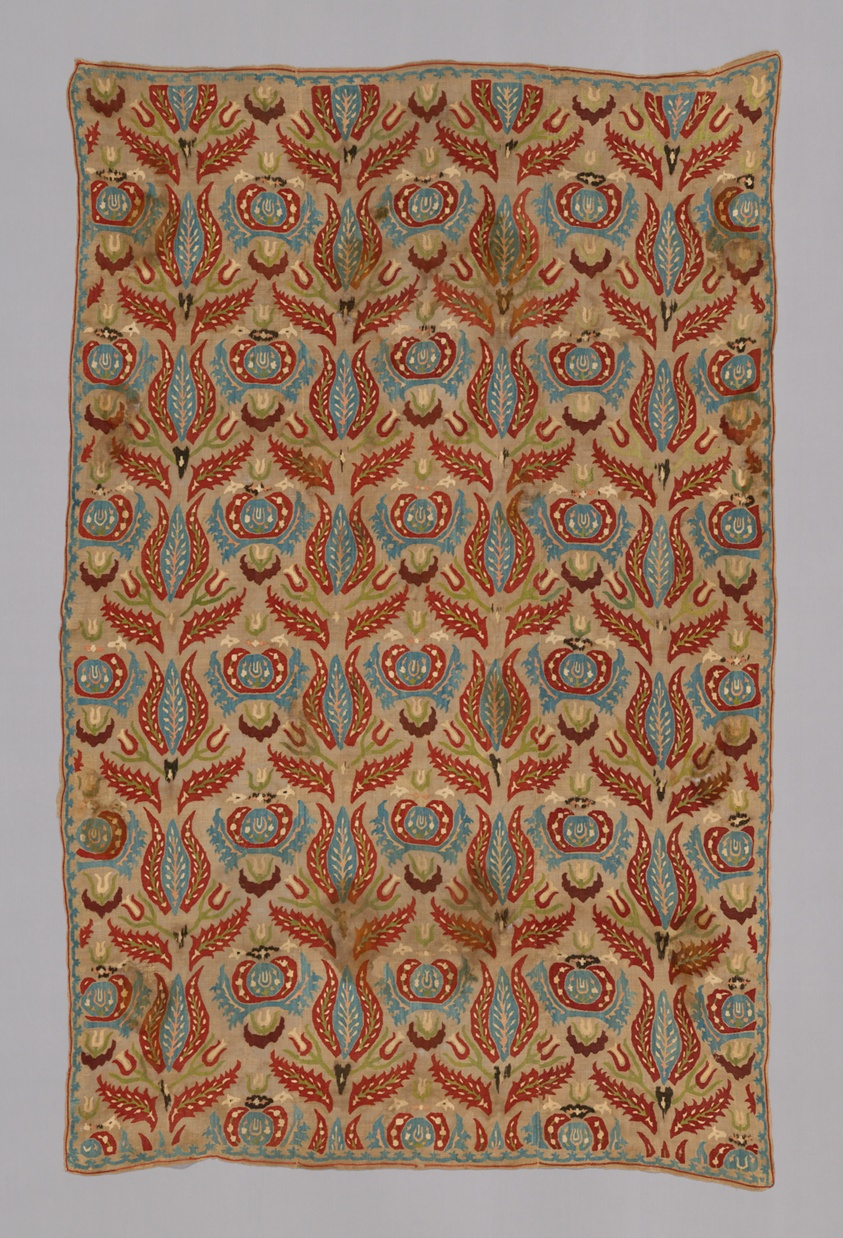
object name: Textile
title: Cover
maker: Turkey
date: 1575/1625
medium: Field covered with alternate vertical rows of floral palmettes, principal unit a large three petal tulip supported by two small tulips and two serrated leaves; secondary unit suggests a carnation; edging of palmettes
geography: Turkey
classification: textile; weaving